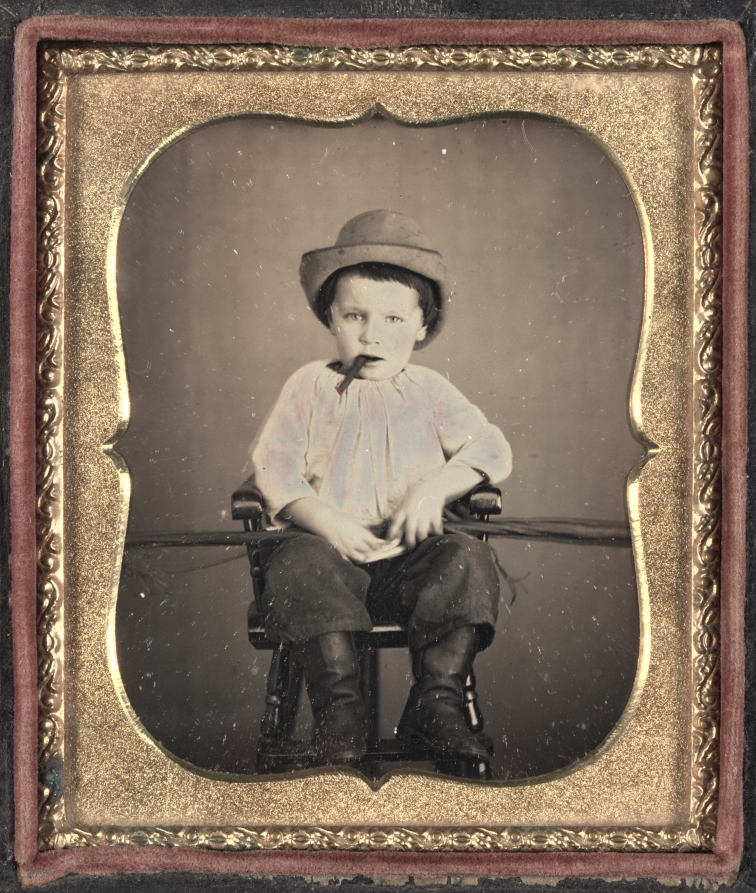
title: Boy with Cigar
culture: America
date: c. 1855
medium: daguerreotype, tinted, sixth plate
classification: Photograph